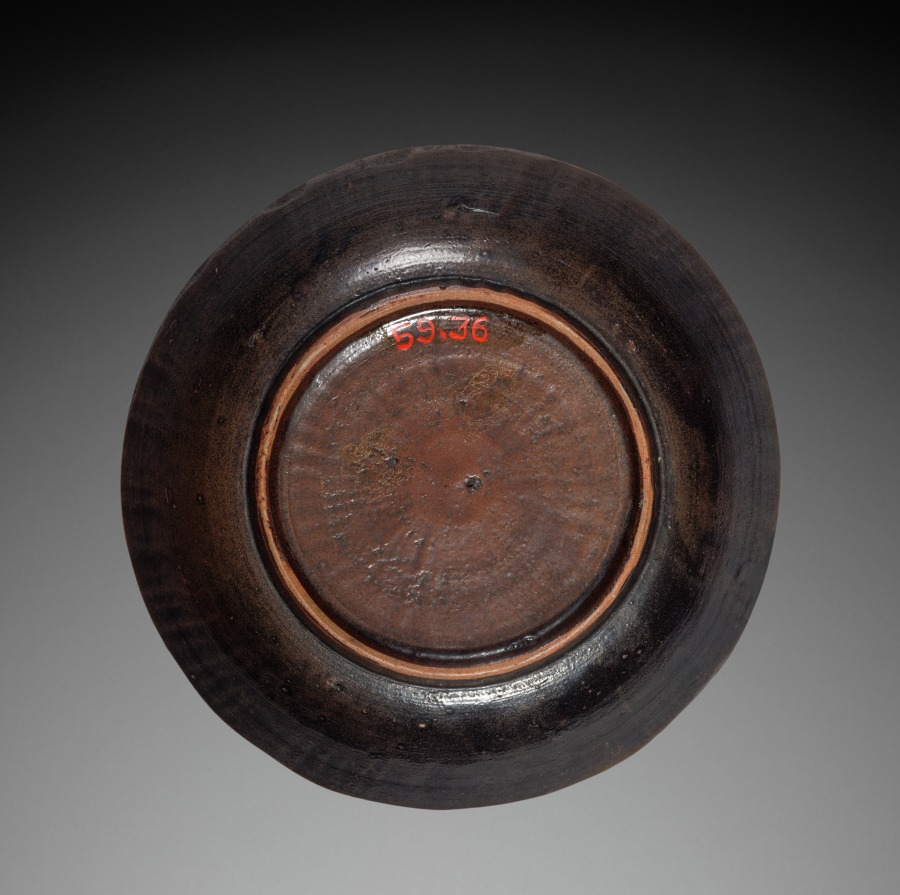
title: Dish with Maple Leaf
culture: Japan, Edo period (1615–1868)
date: 1650–99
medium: porcelain with underglaze blue and iron glaze (Hizen ware, Suisaka type)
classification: Ceramic